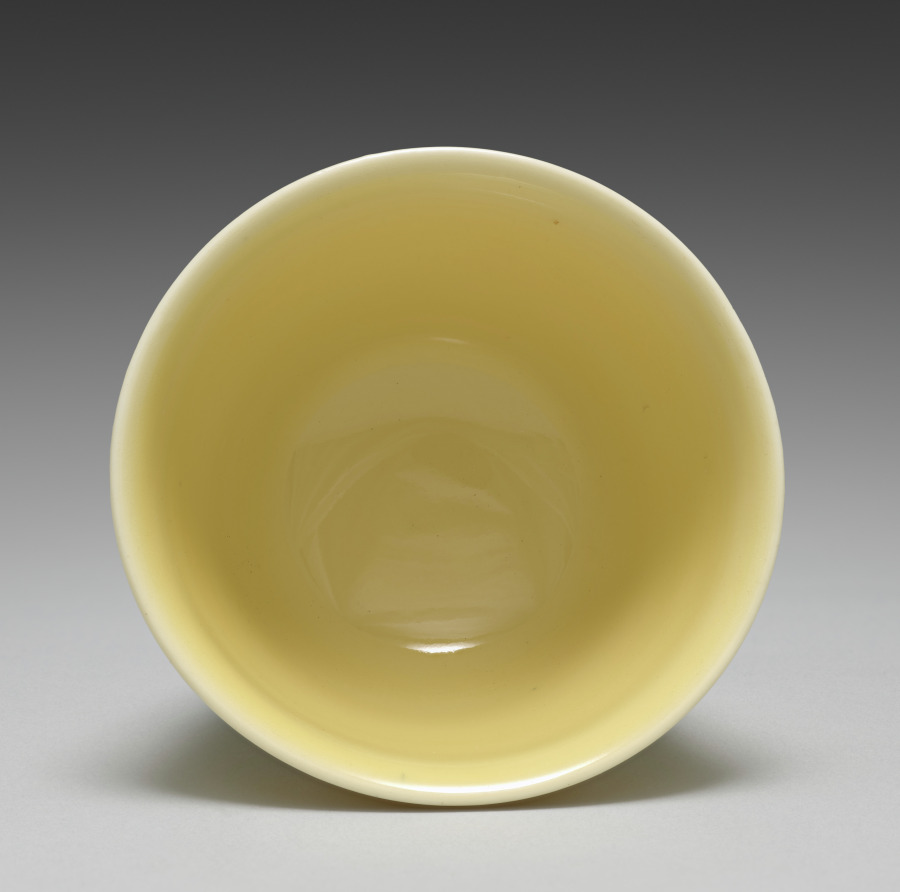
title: Cup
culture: Japan, Taishō period (1912–26) or Shōwa period (1926–89)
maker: Seifū Yohei IV (Japanese, 1872–1951)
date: 1914–46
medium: porcelain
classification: Ceramic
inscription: 清風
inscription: 清風造 【印】成山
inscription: 清風盧人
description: Like his father, Yohei IV also produced works with red or yellow monochrome glazes. His yellow-glazed works include this set of five drinking cups, a pair of sake pourers CMA 2022.216, and a sweets bowl molded into the shape of a chrysanthemum CMA 2022.218.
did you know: Seifū Yohei IV learned the ceramics industry from his father and painting from Tanomura Shosai.